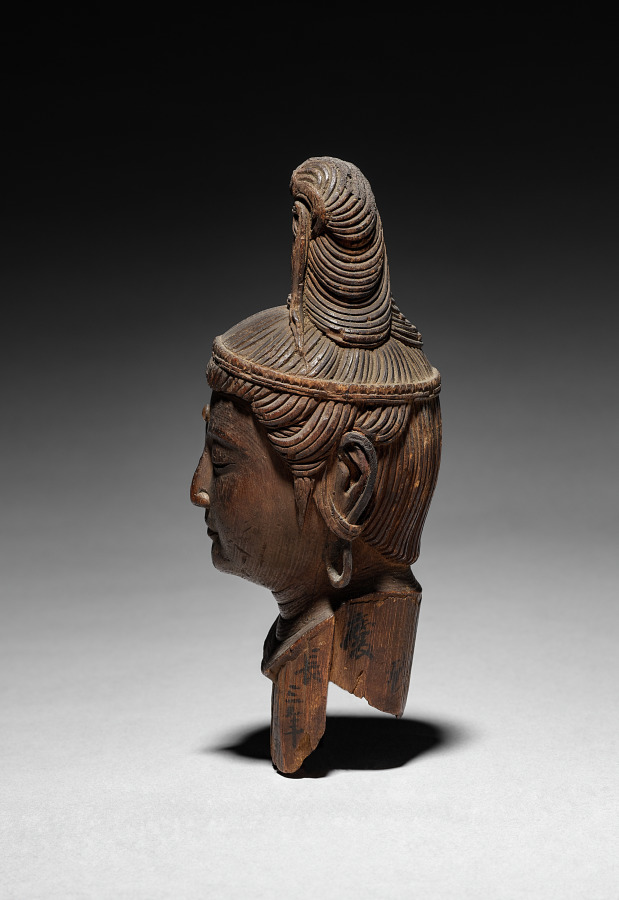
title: Head of Kannon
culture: Japan, Edo period (1615–1868)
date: late 1600s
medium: wood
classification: Sculpture